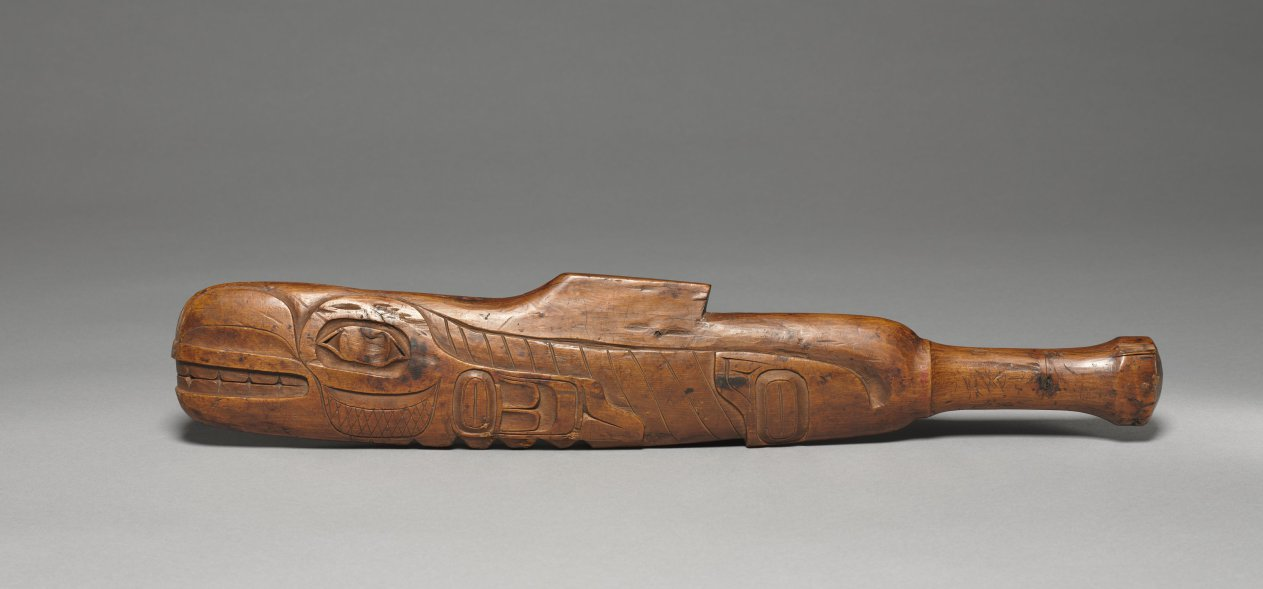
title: Fish or Seal Club (X’ús’)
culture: Native North America, Northwest Coast, Alaska, Tlingit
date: late 1800s–early 1900s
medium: wood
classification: Wood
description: Marine and river resources are crucial on the Northwest Coast, including halibut that can weigh several hundred pounds. The thrashing of such a large fish could endanger a canoe and so, after being thanked for surrendering its life, it was clubbed before being brought safely onboard. This example may represent a sea lion, a proficient hunter.